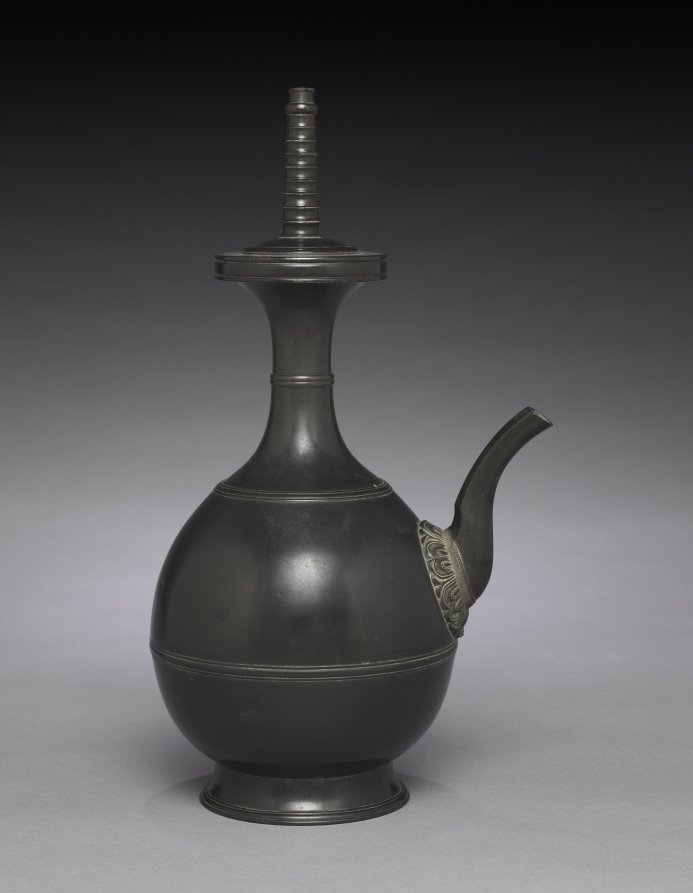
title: Ewer (Fusatsugata Suibyō)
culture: Japan, Kamakura period (1185–1333)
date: 1200s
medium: bronze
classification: Metalwork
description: Ewers of this particular shape developed in Japan for use in Esoteric Buddhist communities, and are called fusatsu-shaped water pitchers. Unlike the ewers commonly used in rituals celebrated before the Buddha, this type is used for the purifying of monks’ hands with water at the start of a Dharma assembly focused on the recitation of the monastic code of conduct, and repentance for transgressions.